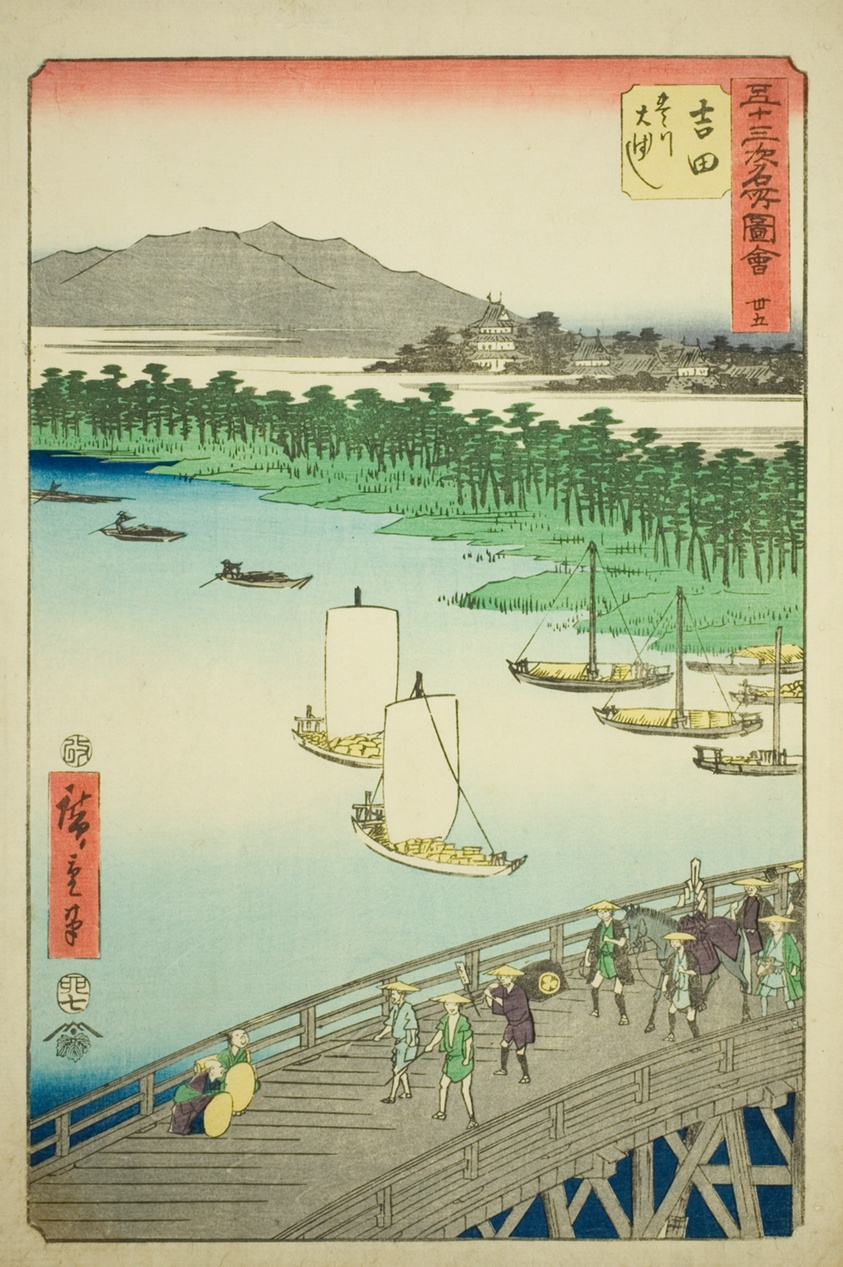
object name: Print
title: Yoshida: Great Bridge on the Toyo River (Yoshida, Toyokawa ohashi), no. 35 from the series "Famous Sights of the Fifty-three Stations (Gojusan tsugi meisho zue)," also known as the Vertical Tokaido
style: Japanese (culture or style)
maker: Utagawa Hiroshige 歌川 広重; Japanese, 1797-1858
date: 1855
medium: Color woodblock print; oban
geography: Japan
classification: woodblock print; print; asian art